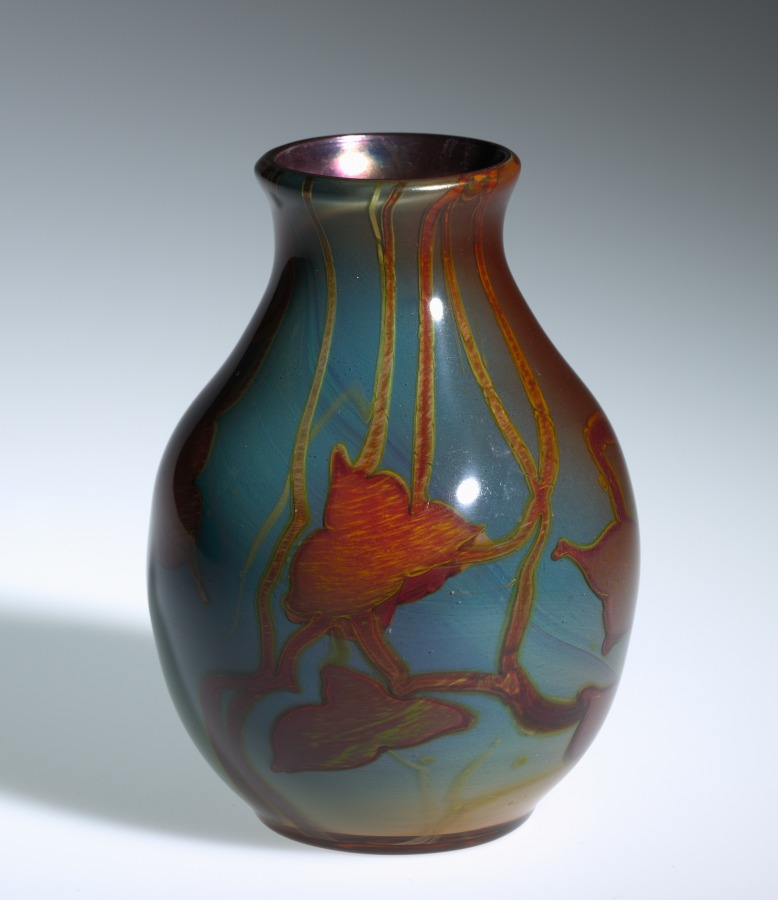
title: Vase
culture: America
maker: Tiffany Studios (United States, New York, 1902–32)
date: c. 1902–15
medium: favrile glass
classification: Glass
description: This small vase is made of Louis Comfort Tiffany's signature Favrile glass. Early on when Tiffany began collaborating with glass artists on new types of production, his aesthetic ambitions were realized in the development of Favrile glass, deliberately named to sound French, expensive, and “handmade.” Largely through Tiffany's marketing ability, Favrile glass became America’s greatest contribution to the Art Nouveau style. His works were exhibited at international expositions; galleries in major European cities, where his creations were bought by many museums; and in his store in Manhattan, known as the Tiffany Glass and Decorating Co., later Tiffany Studios. Along with the many shapes and sizes of his decorative vases, Tiffany used Favrile glass in mosaic panels, stained glass windows, and his artistic line of table and floor lamps.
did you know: Benjamin Hubbell, the architect of the Cleveland Museum of Art, acquired this vase from Louis Comfort Tiffany, with whom he collaborated on various projects.